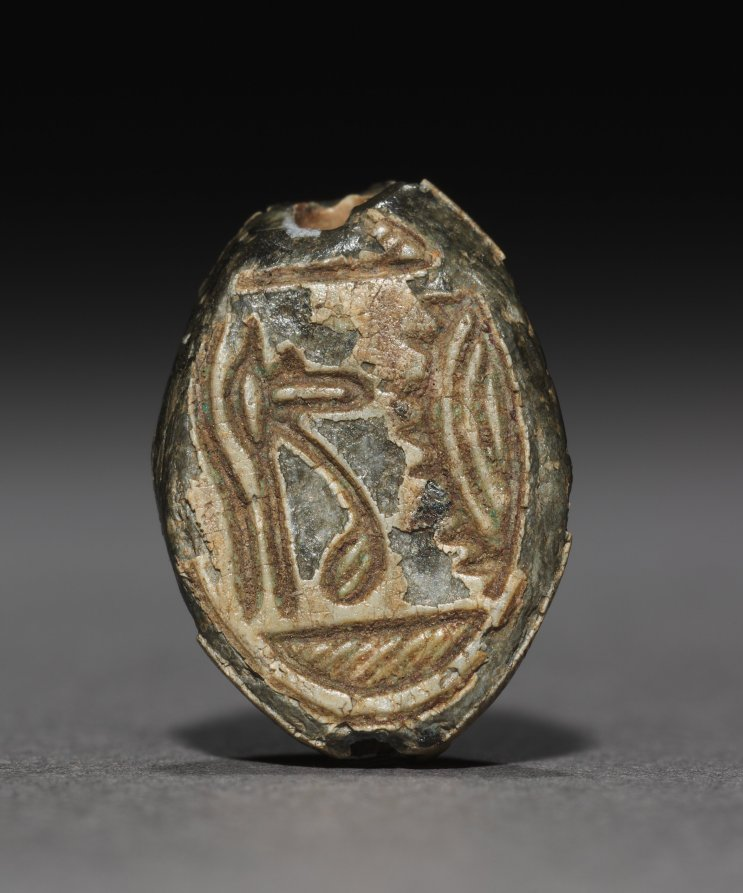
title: Cowroid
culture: Egypt, New Kingdom (1540–1069 BCE), Dynasty 18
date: 1450–1350 BCE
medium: glazed steatite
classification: Scarabs